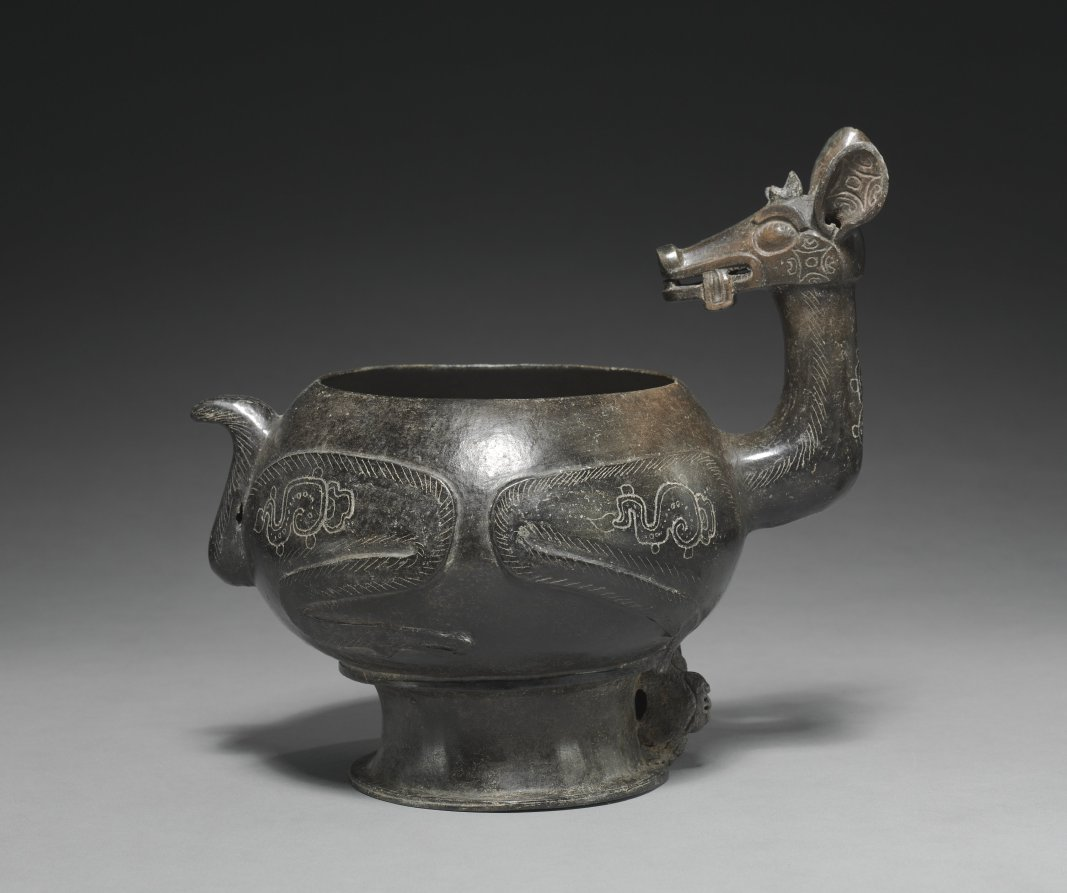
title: Deer Effigy Vessel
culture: Mesoamerica, Maya style, Classic Period (250-900)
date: 250–600 CE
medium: earthenware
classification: Ceramic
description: Maya artwork from the Early Classic Period (about AD 250-600) is dominated by three-dimensional sculpture in jade, stone, wood, and especially ceramic. This vessel is an exceptionally elegant example of Maya blackware, produced by firing earthenware pottery in a reducing (low oxygen) atmosphere. The deer is frequently depicted in Maya art, usually as a victim of either hunting or sacrifice. Venus signs and conch shells engraved on the deer also suggest death, for the planet Venus was regarded as a bringer of ill-fortune, and conch shell trumpets were carried by hunters. The small frog or toad pressed firmly under the deer's hoof relates to agricultural fertility. The croaking of these amphibians was a harbinger of rain.